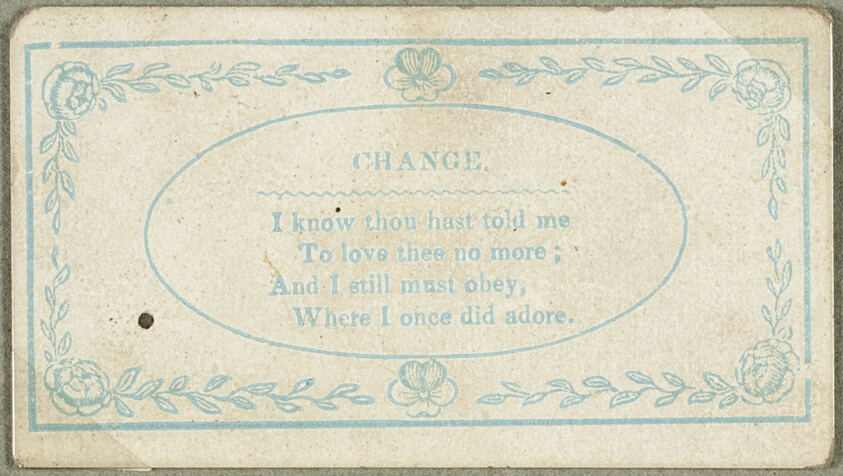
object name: Print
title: Change (valentine)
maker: Unknown Artist; American or English, 19th century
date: c. 1830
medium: Printed text in blue ink on off-white card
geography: United States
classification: collage; valentine; prints and drawing; print